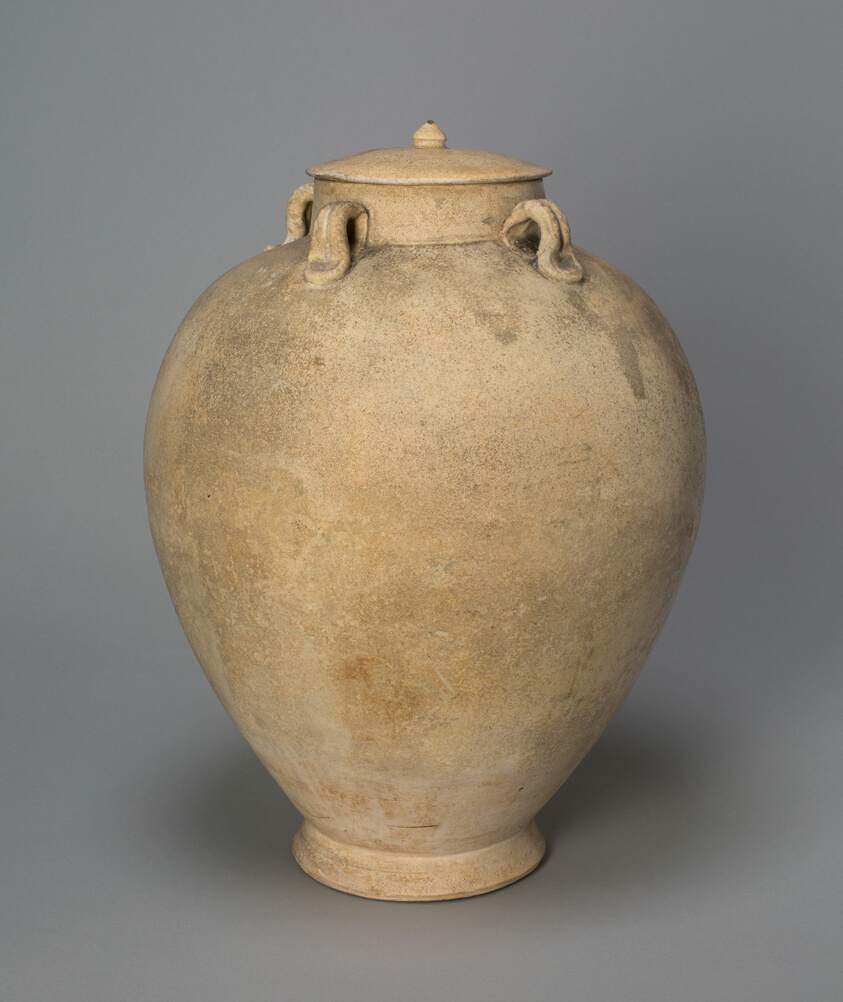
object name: Vessel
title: Covered Jar with Loop Handles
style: Chinese (culture or style)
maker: China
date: Tang dynasty (618–906), 8th century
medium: Slip-coated and glazed stoneware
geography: China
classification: stoneware; asian art; ceramics; vessel